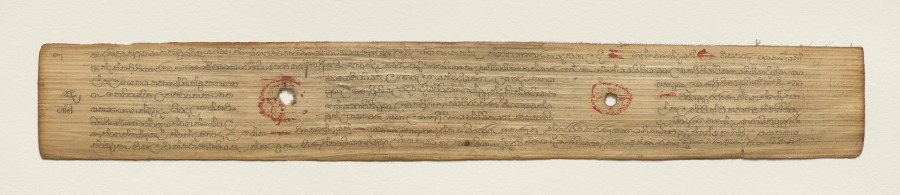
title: Leaf from a Buddhist Manuscript (recto)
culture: Sri Lanka, Singhalese, Late 17th century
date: c. 1700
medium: fiber paper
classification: Manuscript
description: Palm leaf material is still used for manuscripts in Sri Lanka. The palm leaves are prepared first by boiling them, drying them in the sun, and then rubbing them with oils. Scribes then use a metal stylus to incise the text. Then charcoal powder is wiped across the pages, filling in only the inscribed lines.